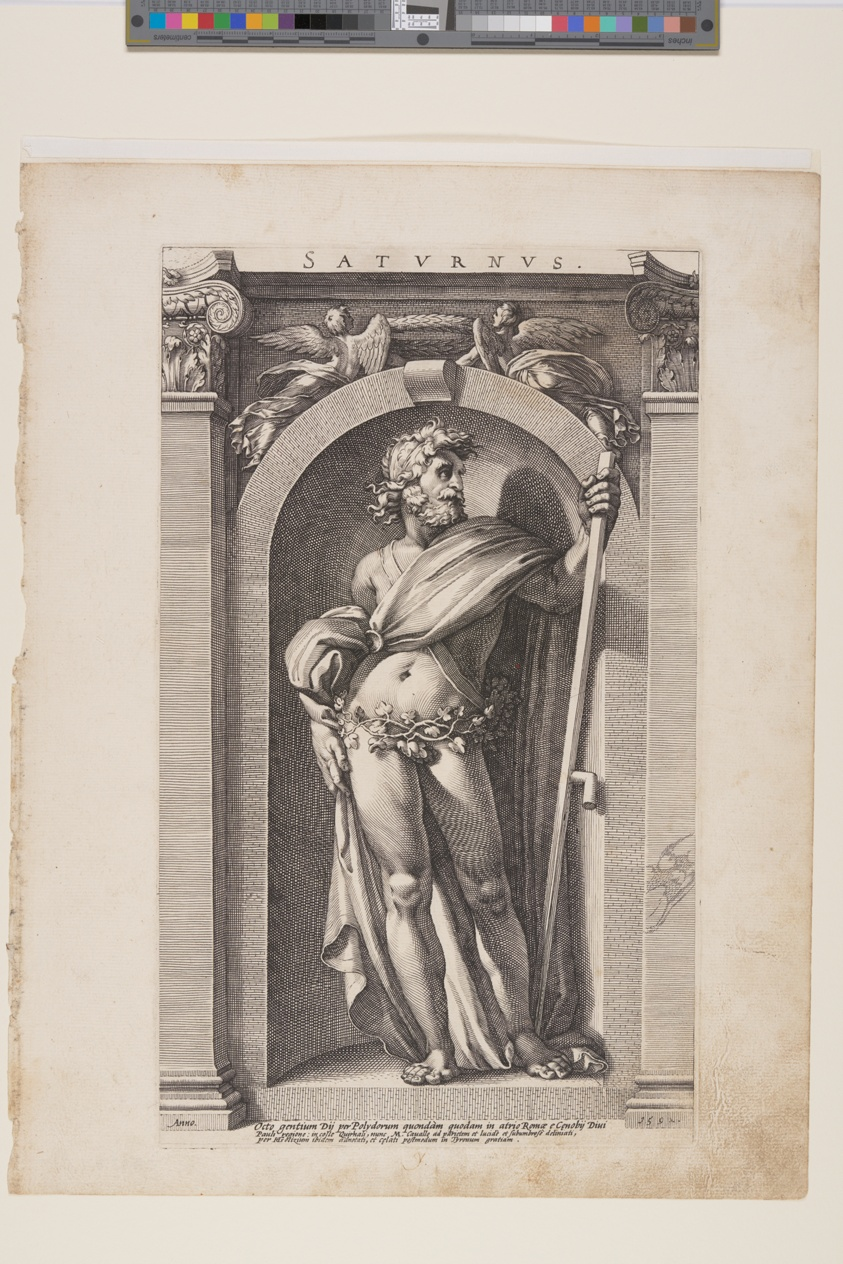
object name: Print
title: Saturnus (Saturn), from Eight Pagan Gods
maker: Hendrick Goltzius (Dutch, 1558–1617); after Polidoro da Caravaggio (Italian, c. 1499–c. 1543)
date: 1592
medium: Engraving on ivory laid paper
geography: Netherlands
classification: print; paper; prints and drawing; engraving